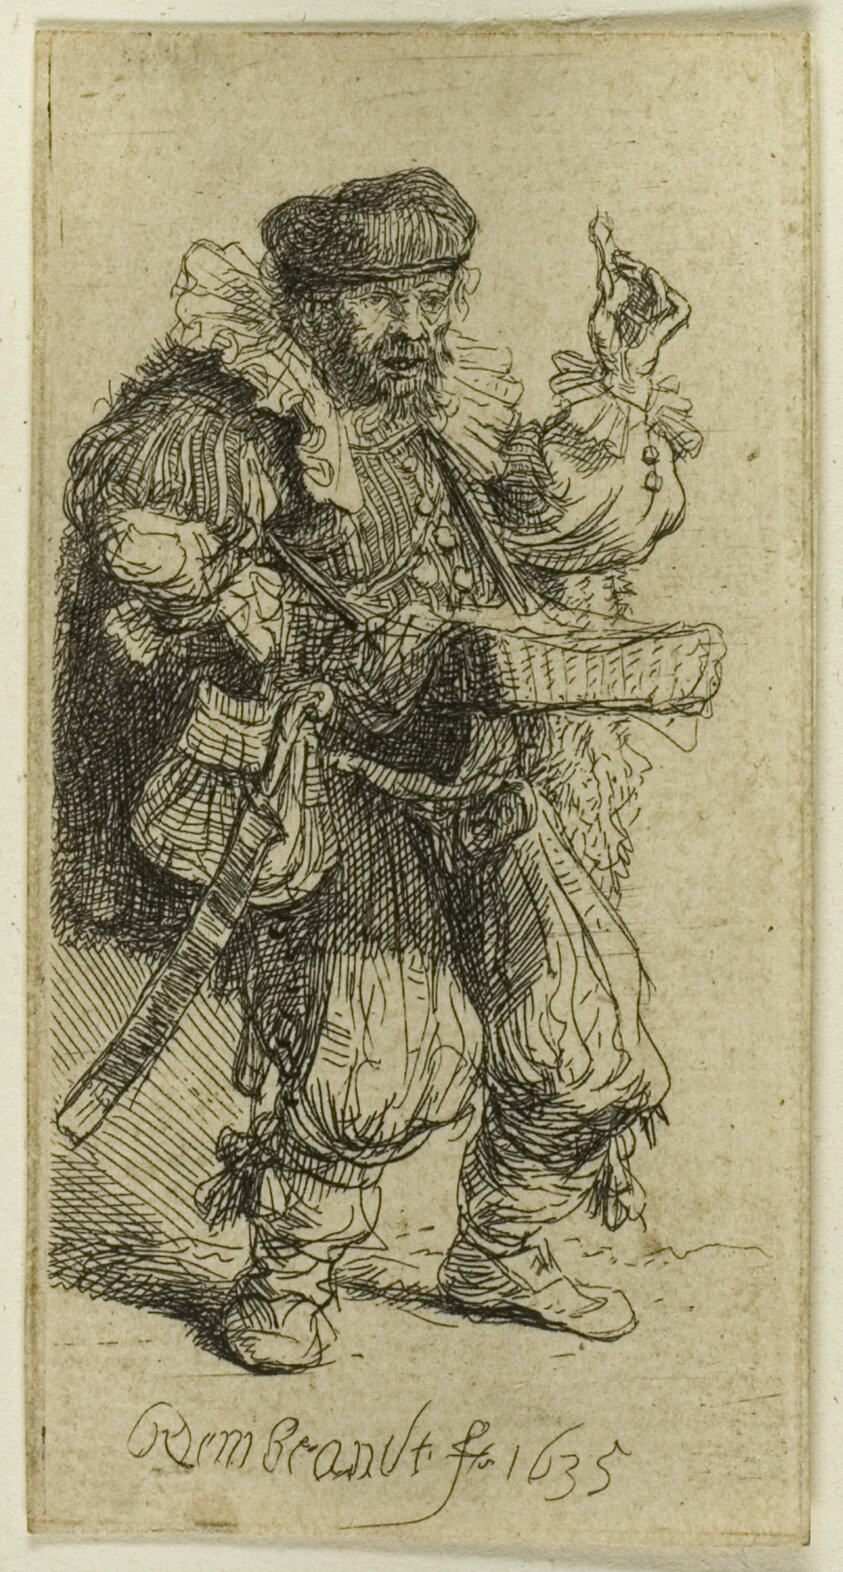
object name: Print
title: The Quacksalver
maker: Rembrandt van Rijn (Dutch, 1606-1669)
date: 1635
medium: Etching on paper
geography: Holland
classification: etching; print; prints and drawing; paper